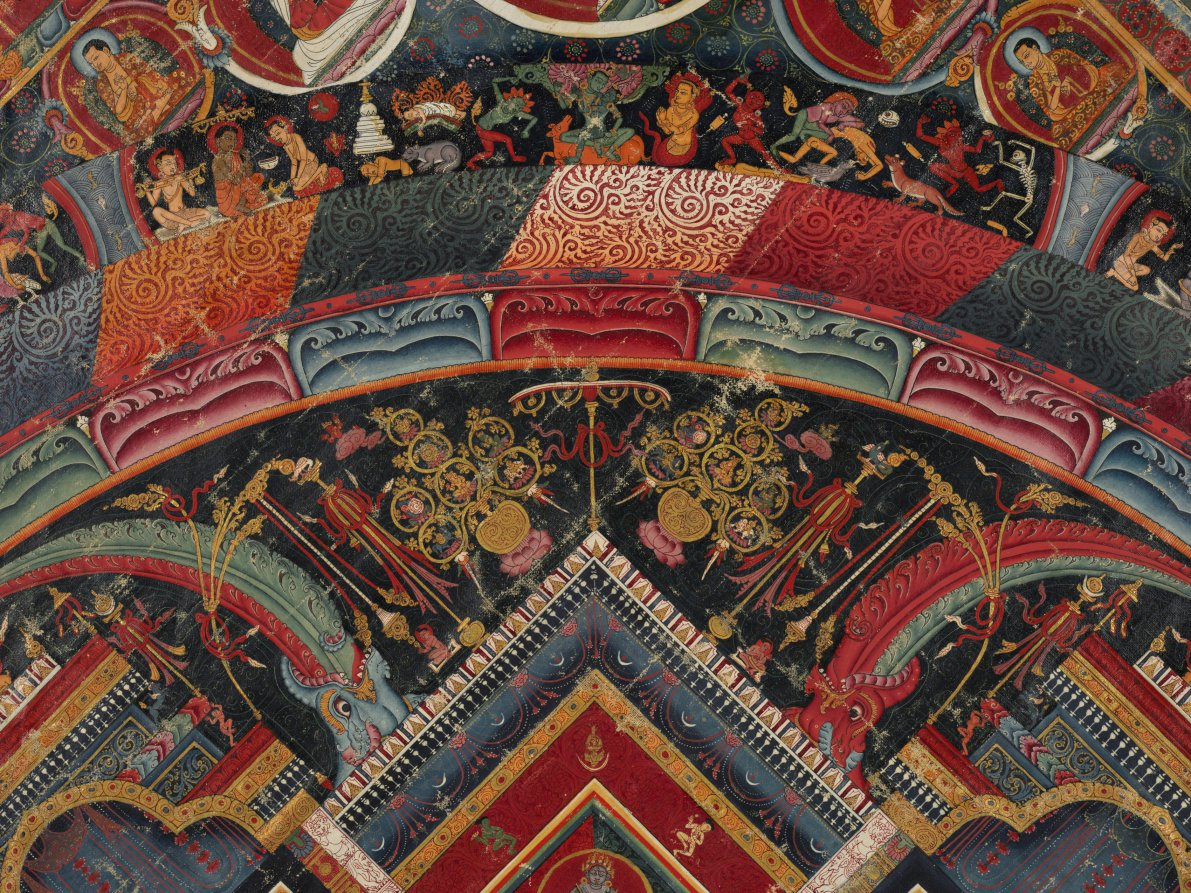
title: Twenty-three Deity Nairatma Mandala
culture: Central Tibet, Sakya-affiliated monastery, 14th century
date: c. 1375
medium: Gum tempera, ink, and gold on cloth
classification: Painting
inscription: The inscription along the bottom says: Twenty-three deity Nairatma Mandala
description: One of the main types of imagery in tantric Buddhist art is the mandala, a two-dimensional diagram of the realm of an enlightened being. This mandala depicts the palace of Nairatma, who dances in the center surrounded by her entourage. Using the painting as a guide, the tantric practitioner in meditation mentally projects the two-dimensional plan into three-dimensional space and enters into it. The outermost ring contains depictions of the cremation grounds, where corpses are being burned and consumed, as well as tantric yogis and masters who work there in order to understand the impermanence of the body, defeat their fear of death, and overcome irrational aversions to impure aspects of life. Virupa is depicted twice, always pointing to arrest the sun with his raised left hand. He sits among the row of lineage masters along the top edge, and is also depicted in the topmost segment of the ring of cremation grounds, being served a cup of liquor. Along with lineage masters at the top of this impressive painting, bodhisattvas and important masters are depicted in the spandrels, each identified by an inscription.